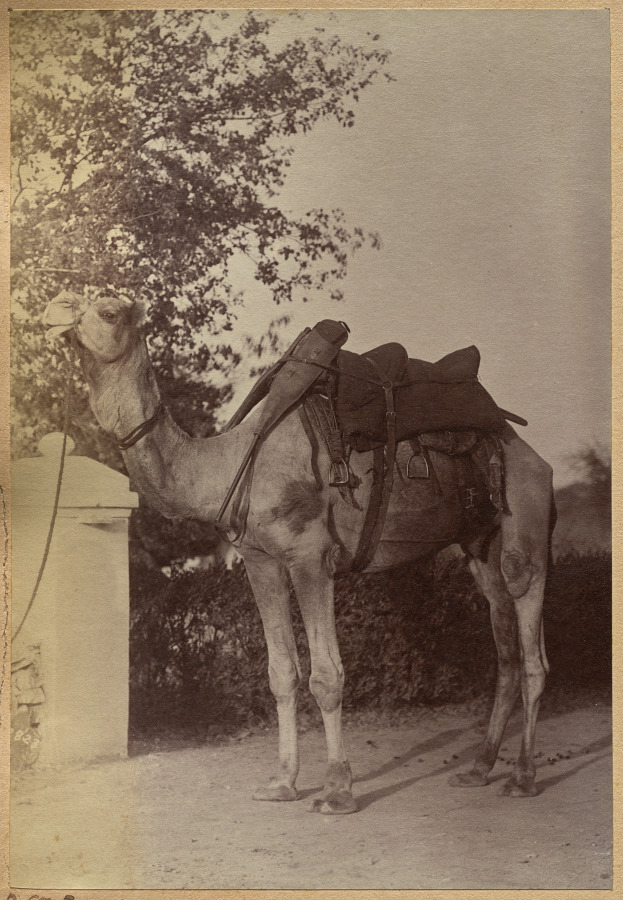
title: Captain Bailward's camel (verso, left)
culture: India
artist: Raja Deen Dayal (Indian, 1844–1905)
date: c. 1882–87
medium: albumen print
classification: Photograph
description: These photographs are part of an album, now disassembled, of around 105 photographs taken in India between 1885 and summer 1887 that provide glimpses into the lives of the British colonial elite and royal and upper-class Indians. The museum holds another group of 37 pictures from this album (2016.266), which was probably commissioned by a British civil servant visiting or working in India around 1888 as a personal souvenir of his experiences there.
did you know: Raja Deen Dayal is regarded now, and was considered during his lifetime, to be India’s most important 19th-century photographer.